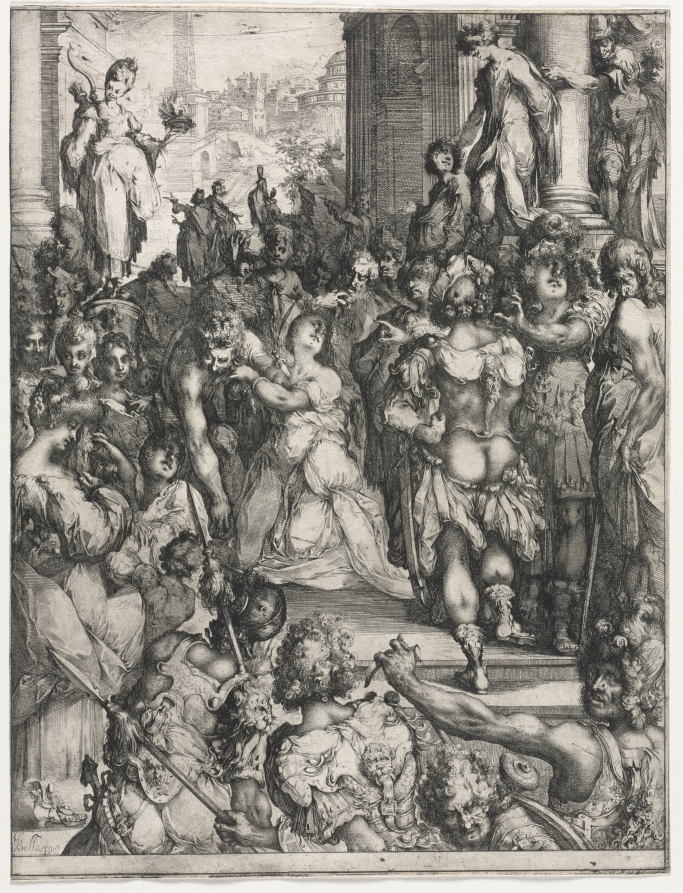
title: The Martyrdom of Saint Lucy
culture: France, 17th century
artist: Jacques Bellange (French, c. 1575–1616)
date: c. 1613–16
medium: etching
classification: Print